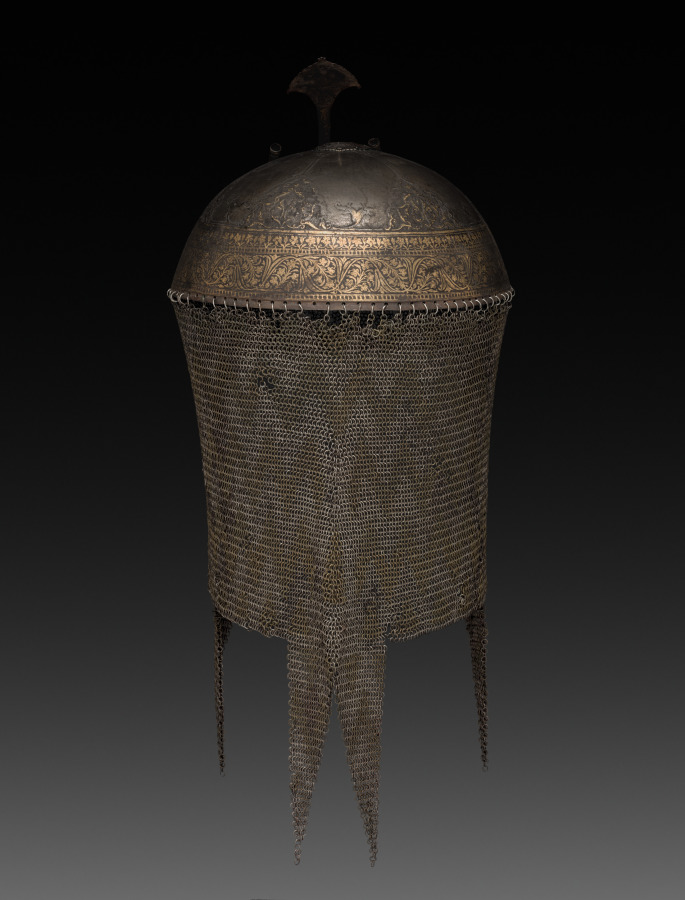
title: Helmet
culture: North India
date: 1600s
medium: steel with gold and brass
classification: Arms and Armor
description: Mughal soldiers wore hemispherical steel helmets to battle. This helmet’s surface features decorative floral patterns created using a process called damascening, in which gold wire was hammered into steel grooves. A leaf-shaped guard slides down in front of the nose for protection. The short tubes on either side of the nasal guard were for holding plumes, most popularly black heron feathers or white aigrettes. The spike that would have been on the apex has broken off. Also missing is the stuffed cotton padding that lined the interior. Chain mail made up of interlocking steel wire rings protected the ears, neck, and shoulders.